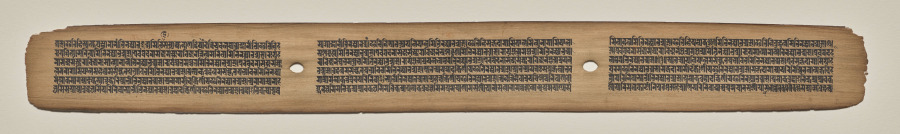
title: Text, Folio 13 (recto), from a Manuscript of the Perfection of Wisdom in Eight Thousand Lines (Ashtasahasrika Prajnaparamita-sutra)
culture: Eastern India, Bihar, Vikramashila Monastery. Painting: Nepal, Kathmandu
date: Sunday, September 14, 1119 (year 239 of the Newar Samvat in the month of Ashvina)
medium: gum tempera and ink on palm leaves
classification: Painting